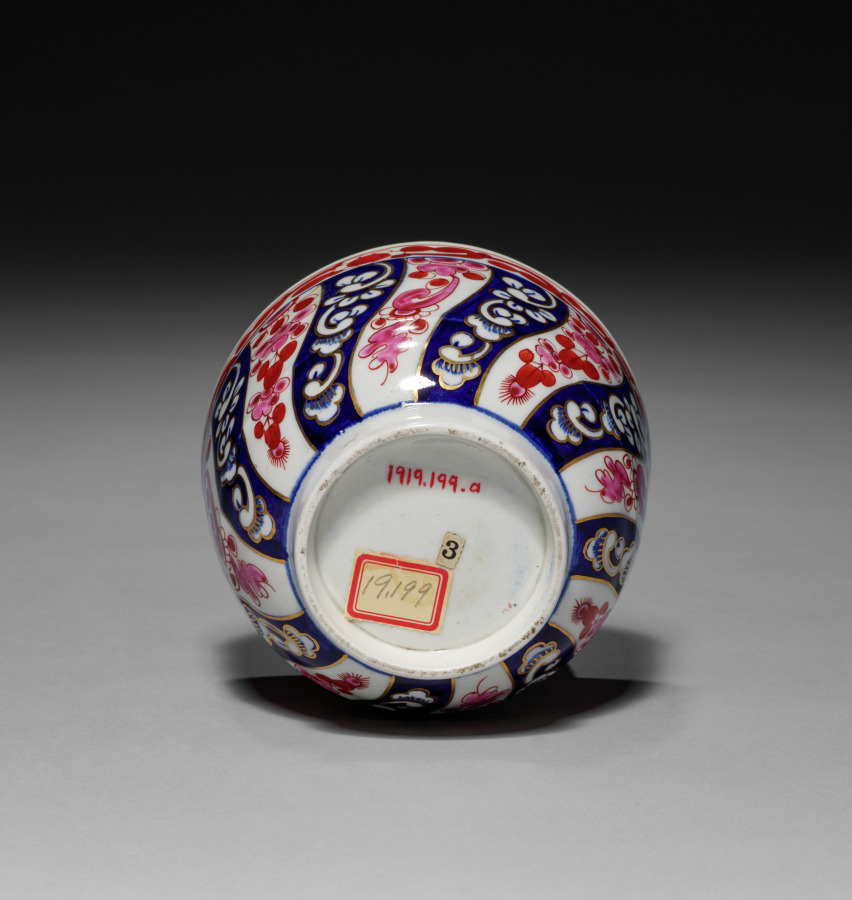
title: Bowl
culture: England, 18th century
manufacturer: Worcester Porcelain Factory (British, established 1751)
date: c. 1770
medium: porcelain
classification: Ceramic